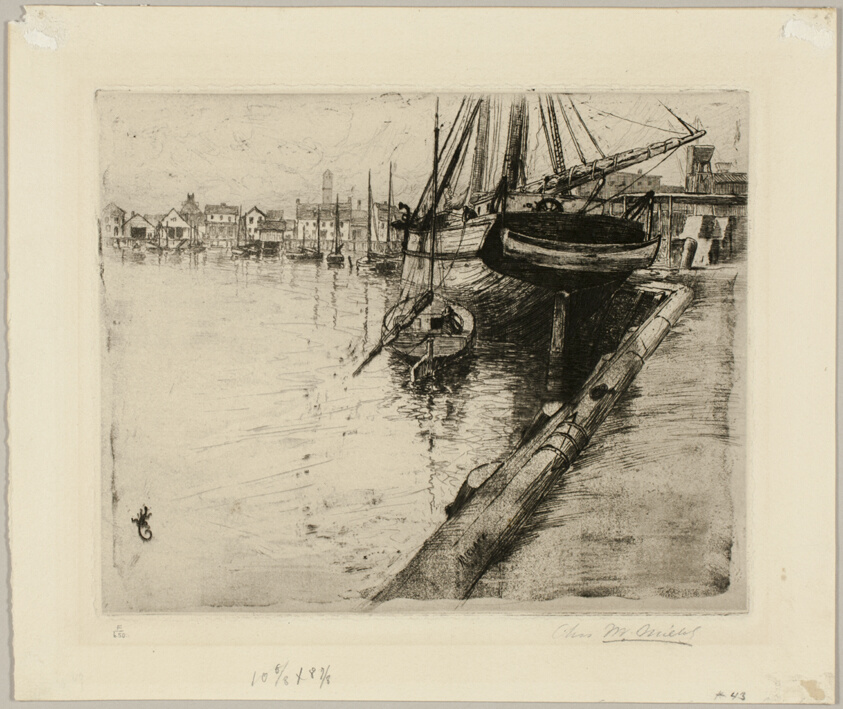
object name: Print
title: Dock, New York River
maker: Charles Frederick William Mielatz (American, born Germany, 1864-1919)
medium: Etching with aquatint in black on cream wove paper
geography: United States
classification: etching; print; prints and drawing